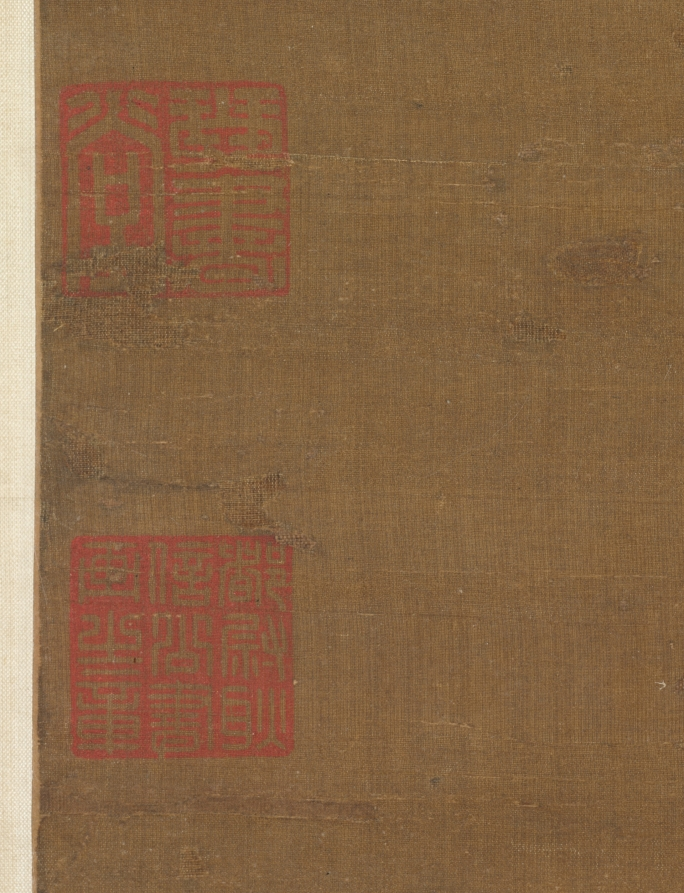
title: Summer Mountains (after Dong Yuan [active c. 937–75])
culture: China, Yuan dynasty (1271-1368)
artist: attributed to Huang Gongwang (Chinese, 1269–1354)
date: 1290–1354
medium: hanging scroll; ink and slight color on silk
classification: Painting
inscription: 【印】一峰道人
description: This monumental landscape is drawn in softly rounded strokes with darker lines frequently applied on top of lighter ones. This technique recalls one of the suggestions included in a collection of the artist's writings known as Secrets of Landscape Painting: The most difficult thing in painting is using the ink. The artist begins by using dilute ink and builds it up to the point where it begins to look right, then uses dense, black ink, applied fairly dry, and washes of deeper-toned ink. This technique distinguishes the fields from the paths, the far from the near. Huang Gongwang may have learned this technique from observing nature through the eyes of an earlier master, Dong Yuan, a painter whose style he shared.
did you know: The wet hills and moist, rich atmosphere evoke the southern Chinese summer, characterized by monsoon rains and lush growth.